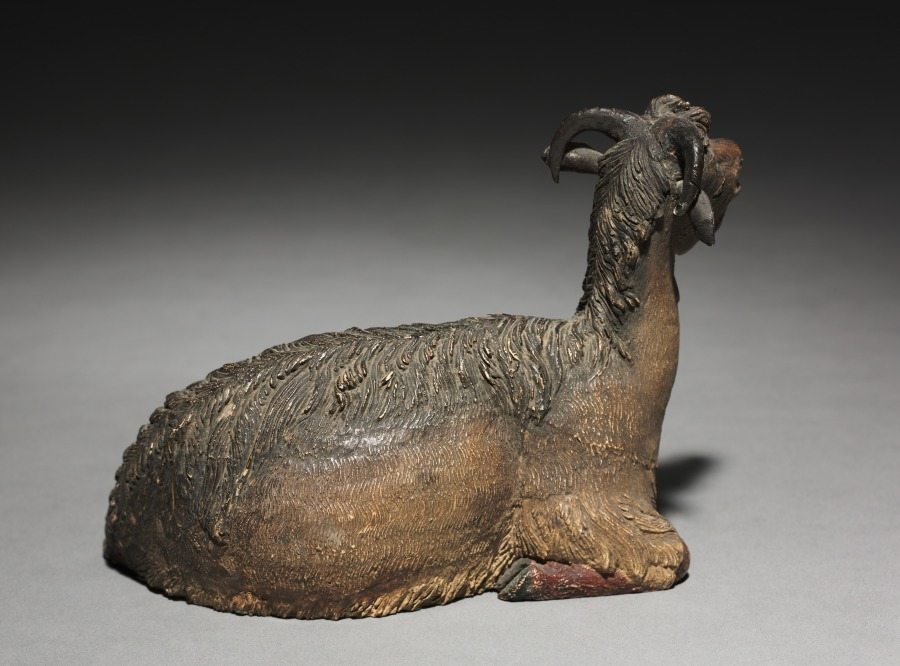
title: Figure from a Crèche: Sitting Ram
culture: Italy, Naples, late 18th-early 19th century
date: 1780–1830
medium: painted terracotta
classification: Sculpture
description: The practice of creating scenes of the Nativity for the home dates from the early 1700s in Italy, where people began to set up doll-like figures of about a foot or less in height. The custom was particularly popular in Naples around 1800, where crèche scenes (crèche means cradle, or crib) included many figures, whose heads and hands of painted terracotta, stuffed cloth bodies, and clothing adapted from contemporary local costumes gave them an amazingly realistic character. Representations of the birth of Jesus can be traced to the first few centuries of Christianity. Both living creatures and sculptural depictions of them were used from early times. By the late middle ages it was customary to create life-size figures of wood or stone, naturalistically painted, to represent the characters who participated in the events of Jesus's early life. These sculptures were then arranged in scenes illustrating one or both of the most important of these events, the Adoration of the Shepherds and the Adoration of the Magi-the three kings from the East who came to pay homage to the Christ child. Used in churches, these large figures were especially popular in Italy, Central Europe, Spain, and Portugal. This Object in Focus presentation was organized by Henry Hawley, Curator of Renaissance and Later Decorative Arts and Sculpture.